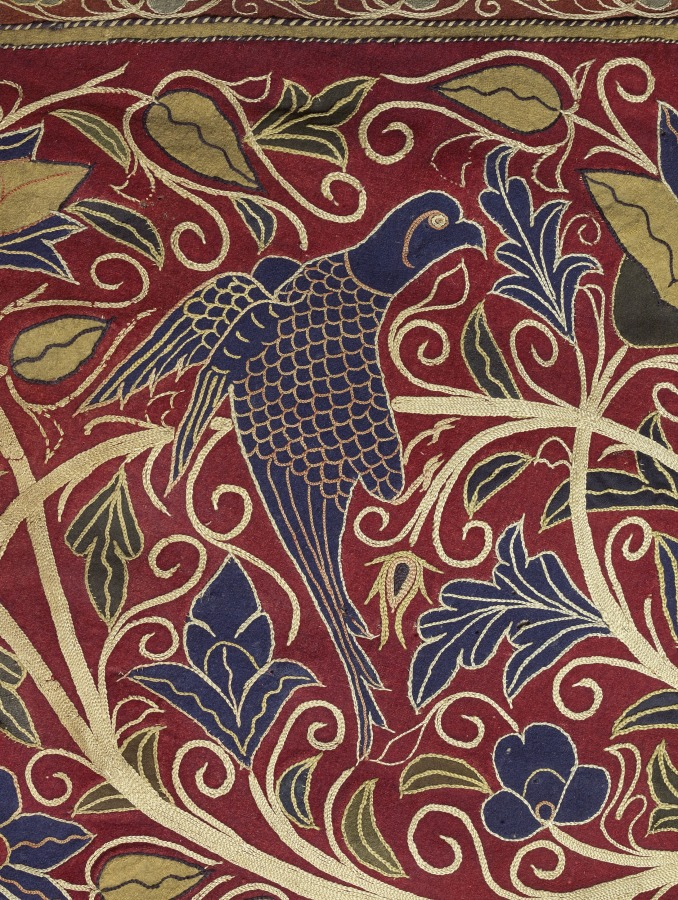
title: Royal Round Tent made for Muhammad Shah (Roof)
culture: Iran, Rasht, Qajar period (1779-1925)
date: 1834–48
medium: Interior: wool: plain weave, inlaid work; silk: embroidery, chain stitch; tape, leather; Exterior: cotton, wool: plain weave; rope, iron ring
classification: Textile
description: Royal tents were potent symbols of authority, wealth, and power throughout the greater Middle East. Rulers owned thousands of tents. They were used for shelter, shade, and innumerable functions in tent compounds that were essential for imperial ceremonies, travel, and military campaigns. Distinguished by size with elaborately decorated interior walls and ceilings, tents could be as large as castles. Opulent tents were also presented as imperial gifts. Tents are only known through documents before 1600. For example, in Baghdad in 809, Caliph Harun al-Rashid owned 4,000 ceremonial tents and 150,000 camping tents that were stored in the imperial Abbasid treasury. An astonishing variety and quantity of tents were housed in the royal Fatimid tent storeroom in Cairo in 1068-69, including "military tents, fortress tents, and castle tents, manufactured of . . . gold-brocaded stuff embroidered with designs of elephants, wild beasts, horses, peacocks, birds." Since 1600, Ottoman Turkish tents with elaborate floral decoration have been preserved in Istanbul in the Topkapi Palace Museum and Military Museum, and in European collections as war booty, primarily from the Ottoman Turks' attempt to conquer Vienna in 1683. These tents are not done in the Rasht technique, but rather are applique. In contrast, royal tents from Iran are extremely rare. This spectacular ceremonial tent is embroidered with the name of its owner, Muhammad Shah, who ruled Iran from 1834 to 1848 during the Qajar dynasty. The radiant jewellike interior features exuberant flora, blossoming vines, and robust birds made with colored wool embellished with silk-thread embroidery.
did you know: Rasht work is named after the city on the Caspian Sea in present-day Iran, which was a major silk trade center with numerous textile workshops.